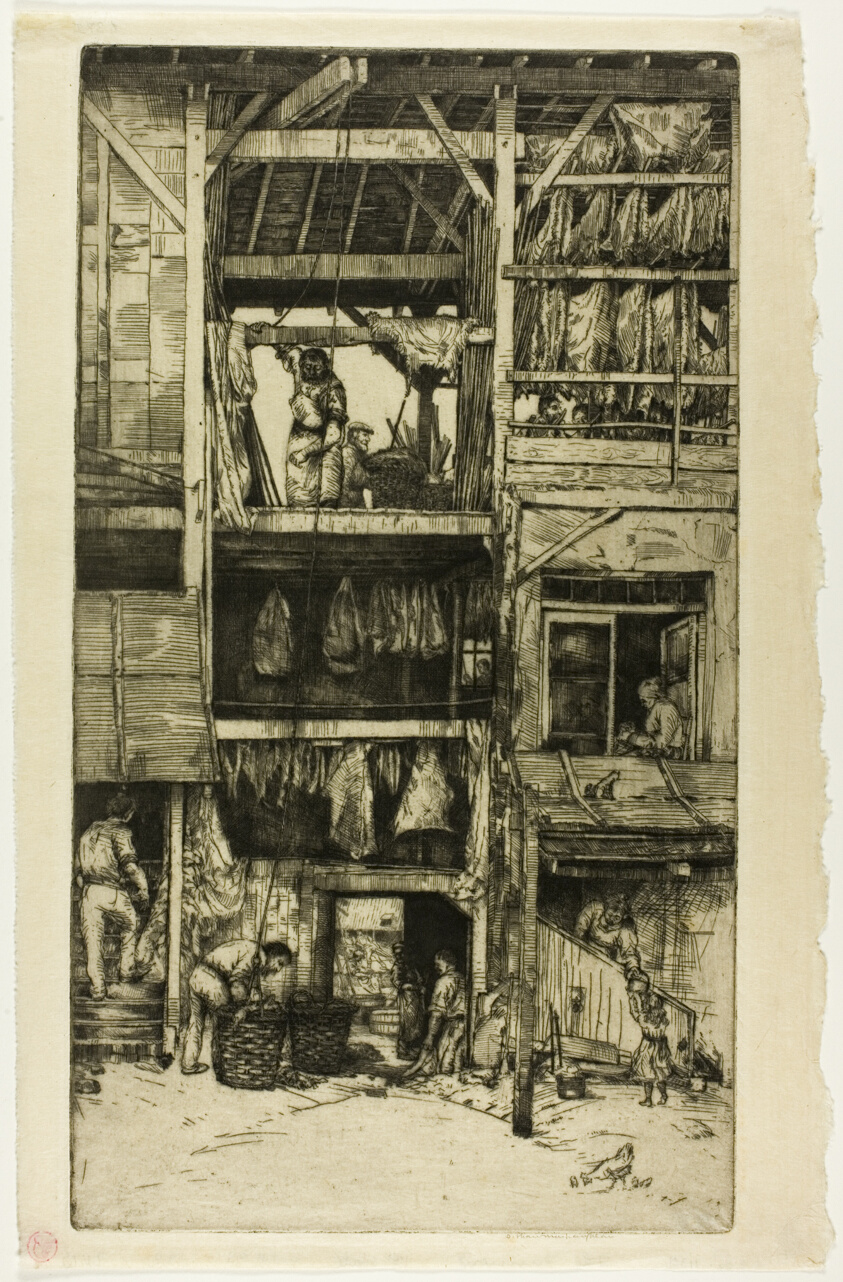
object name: Print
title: The Tannery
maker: Donald Shaw MacLaughlan (American, born Canada, 1876-1938)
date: 1901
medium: Etching in black on cream wove paper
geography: United States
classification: etching; print; prints and drawing